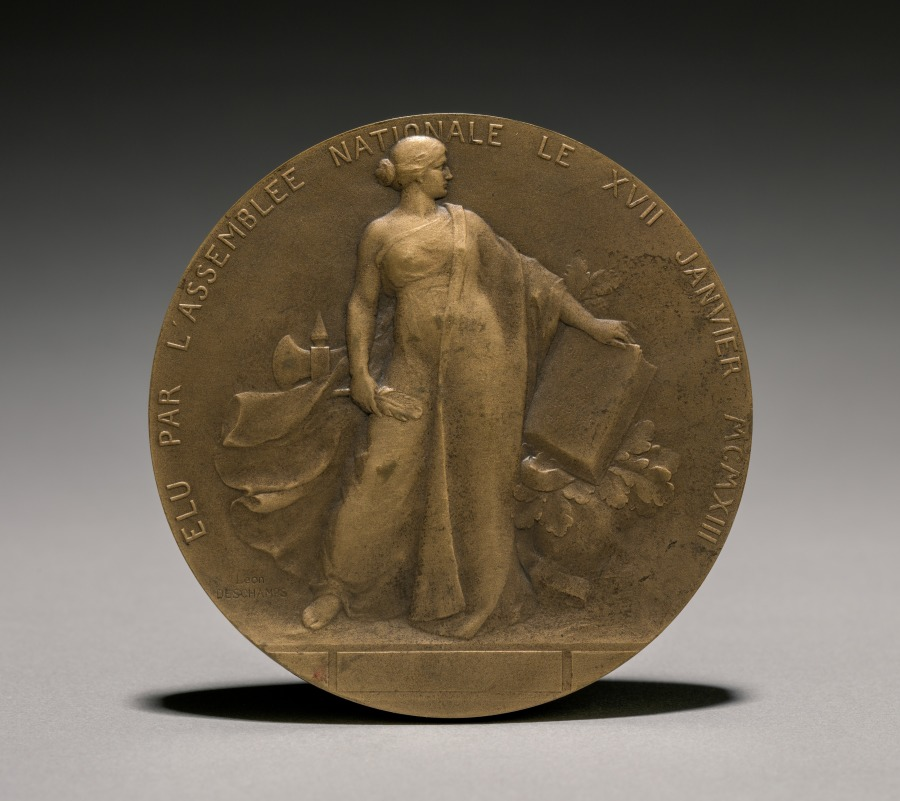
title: Poincarè Medal (reverse)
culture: France, 20th century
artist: Léon Julien Deschamps (French, 1860–1928)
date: 1900s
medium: bronze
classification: Metalwork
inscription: woman holding book on which is inscribed: "Poincarè President de la Republique Francaise"; above: "Elu par l'assemblee nationale le XVII Janvier MCMXIII."